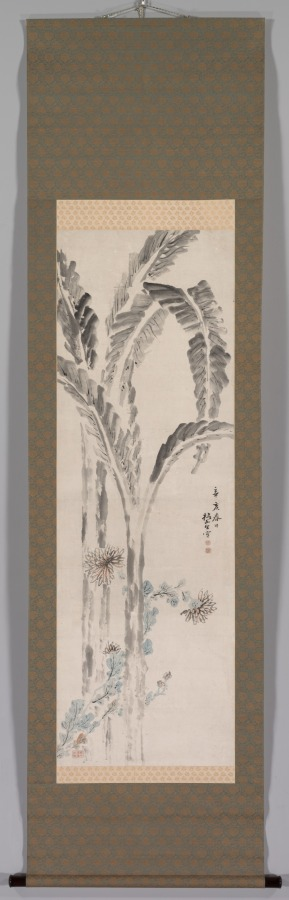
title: Banana Plant and Chrysanthemum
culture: Japan, Edo period (1615–1868)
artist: Tsubaki Chinzan (Japanese, 1801–1854)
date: c. 1820–54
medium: hanging scroll; ink and color on paper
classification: Painting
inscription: artist's inscription and two seals middle right side.